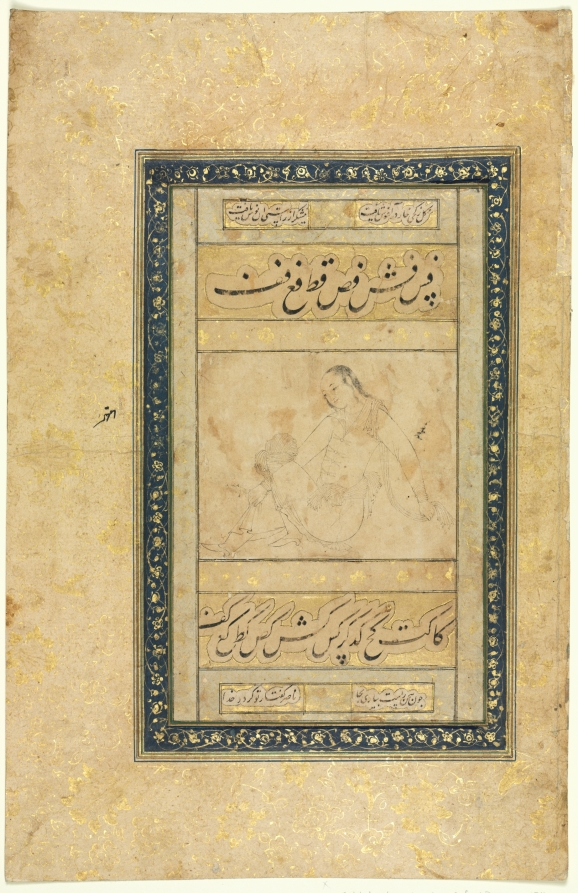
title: Sketch of a Young Man and Persian Calligraphy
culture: Iran, Isfahan, Safavid period (1501-1722)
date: 1630–50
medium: opaque watercolor, ink, and gold on paper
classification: Drawing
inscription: script: Nasta'liq